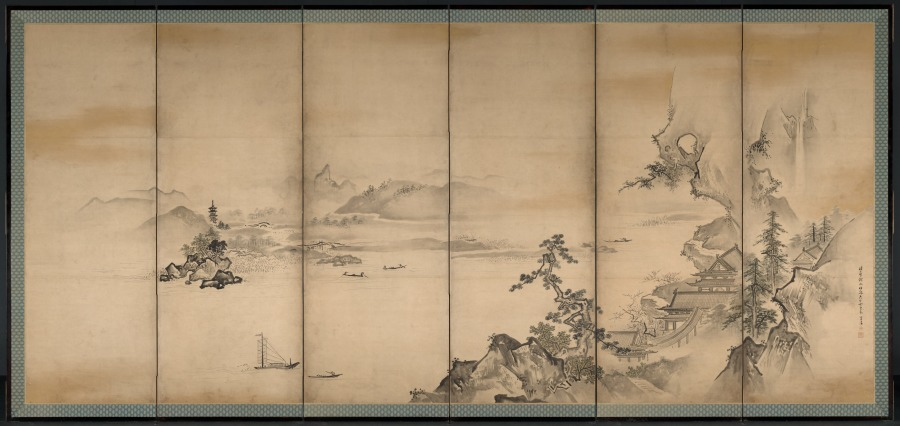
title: The Four Seasons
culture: Japan, Edo period (1615–1868)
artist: Kano Tan’yū (Japanese, 1602–1674)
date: 1668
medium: pair of six-panel folding screens, ink and slight color on paper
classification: Painting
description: Tan'yū's skills were honed early within the regimen of the Kano family's painting studio. His grandfather, Eitoku (1543–1590) was the Momoyama period's most sought-after painter, a champion of colorful, large-scale painting compositions who worked for several of the country's most powerful leaders. When the young Tan'yū was summoned to Edo in 1617 by the shogun to become a member of the new capital's official painting studio, few opportunities to work on similarly ambitious projects existed. Yet by the end of his career, Tan'yū had supervised the execution and installation of linked mural painting compositions in several of Japan's most prestigious residences and castles. As an official court painter to the first shogun, Tokugawa Ieyasu (reigned 1603–5), and then his successors, Tan'yū appears to have successfully juggled his official duties with private activities as a teacher, as the era's leading connoisseur of classic Chinese and Japanese painting, and as a practicing artist. His surviving compositions as well as thousands of sketches far surpass the oeuvre of any of his contemporaries. While studio assistants surely contributed to his oeuvre, just as later imitators consciously confused his accomplishments, a clearer image of the painter has emerged in recent years that better conforms with his contemporary acclaim as recorded in seventeenth- and eighteenth-century documents. Tan'yū can now be seen as an artist adept in virtually all traditional ink painting subject matter, which he often presented in novel interpretations. Equally important are his rare screen (byōbu) compositions executed in a pure yamato-e manner with vivid mineral pigments on a gold-foil background. This pair of byōbu presents Tan'yū's more orthodox approach to academic ink painting methods embracing Chinese themes that had been interpreted by numerous Japanese ink painters over the centuries. Thus a typical view of residences and human activities set along the shores of an impressive river (or lake) is enlivened by the Japanese proclivity for including seasonal references. Proceeding from right to left, the viewer passes sequentially from spring to the snow-laden branches of winter. Tan'yū lends considerable atmospherics to the panorama in his use of misty cloud banks, frequently set off by sharp, darkened ink lines or whole areas of ink washes of variegated tonalities. The spring and summer views are particularly notable in this regard, as is the presence of the artist's signature on both byōbu, attesting to their completion in Tan'yū's sixty-seventh year (1668)—50 years after he left Kyoto for the capital, and 30 years following his adoption of the artist name "Tan'yū" (in 1635). From 1622, when he began work on the mural paintings for Edo castle (the shogun's formal residence), through the completion of the painting cycle in 1636 for the Tokugawa family mausoleum in Nikkō to the north of Edo, Tan'yū's skills as head of an accomplished painting studio as well as a master painter found their most impressive expression in large-scale compositions. In 1638 he received the honorary Buddhist title Hōgen (Eye of the Law). It is intriguing therefore that relatively few independent byōbu paintings from the master's hand survive, particularly documented early works.